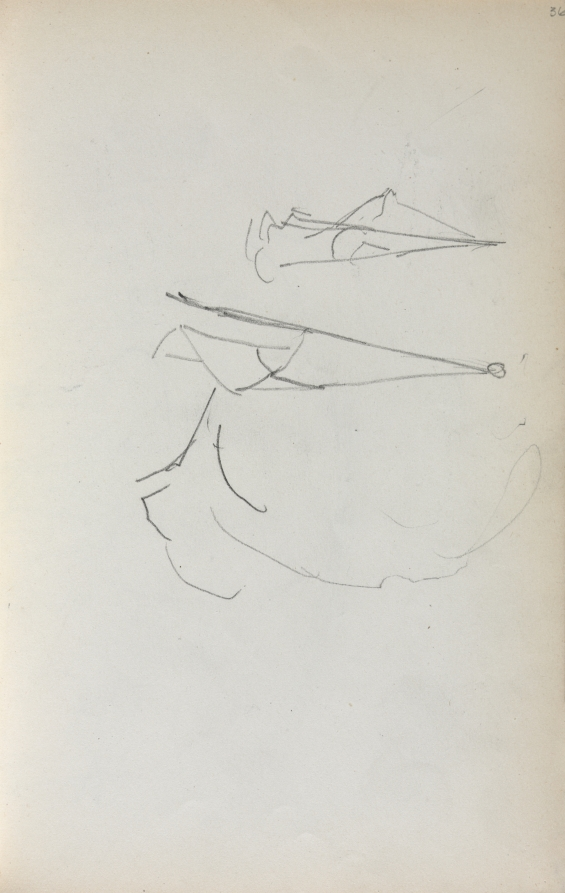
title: Italian Sketchbook: Sails (page 36)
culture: America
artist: Maurice Prendergast (American, born Newfoundland [now Canada], 1858–1924)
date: 1898–1899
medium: pencil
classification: Bound Volume